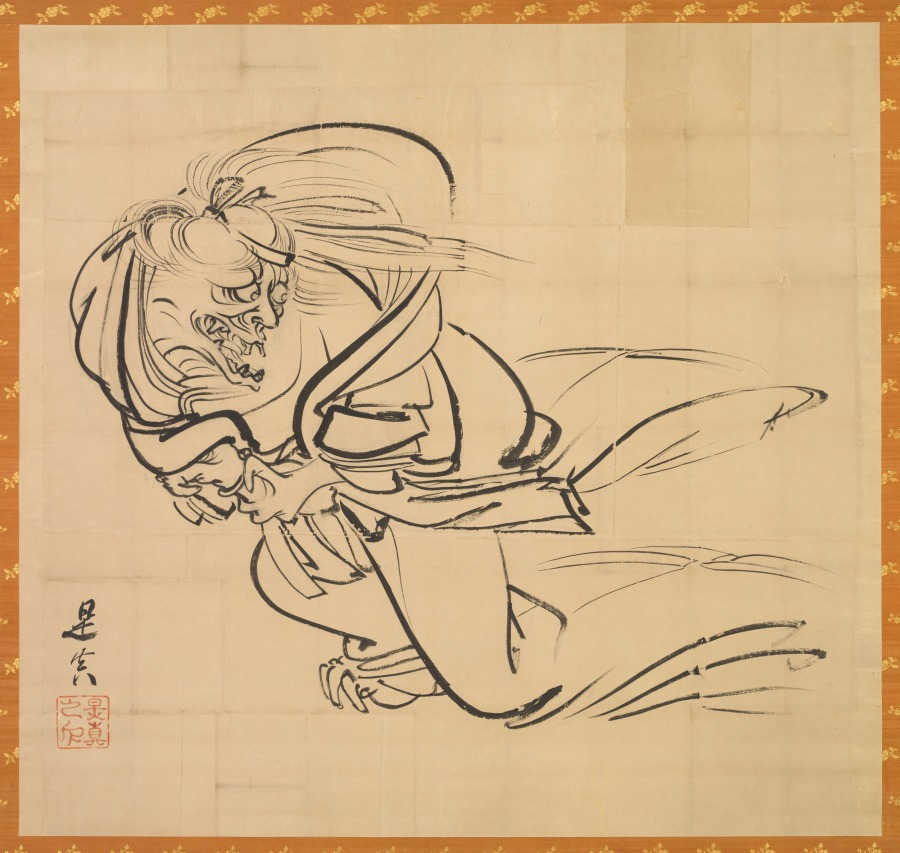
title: Sketch of Ibaraki-dōji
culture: Japan, Edo period (1615–1868)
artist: Shibata Zeshin (Japanese, 1807–1891)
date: c. 1840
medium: hanging scroll, ink on paper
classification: Painting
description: Even before the arrival of US ships demanding trade, Japan’s military government was experiencing economic challenges. This preparatory drawing is for a wooden plaque to be offered to a shrine, beseeching divine intervention in business affairs. Commissioned by a wholesalers’ union, it shows the demon Ibaraki-dōji reclaiming his arm from a warrior who, according to legend, had cut it off. The repossession of the arm is a metaphor for the union’s desire for the restoration of rights to sell sugar, which had been rescinded by the government as part of a misguided effort to stabilize the economy.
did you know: The demon Ibaraki, having disguised itself as the aunt of warrior Minamoto no Yorimitsu to gain access to its severed limb, is shown is in the midst of transforming back into demon form.